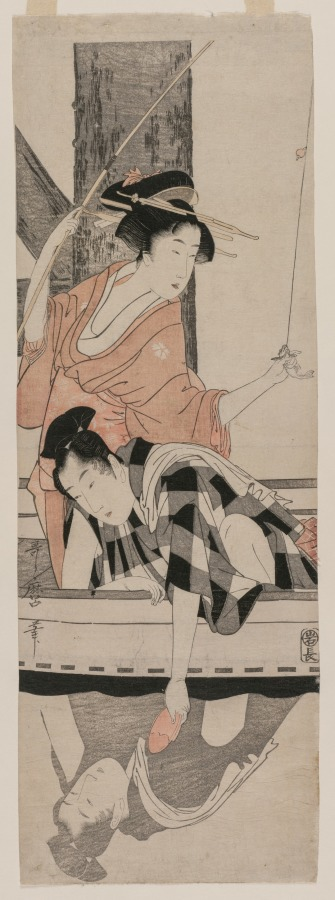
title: Couple in a Boat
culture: Japan, Edo period (1615–1868)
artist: Kitagawa Utamaro (Japanese, c. 1754–1806)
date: c. 1799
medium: color woodblock print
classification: Print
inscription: Signature: Utamaro hitsu Publisher: Iwatoya (Iwacho)